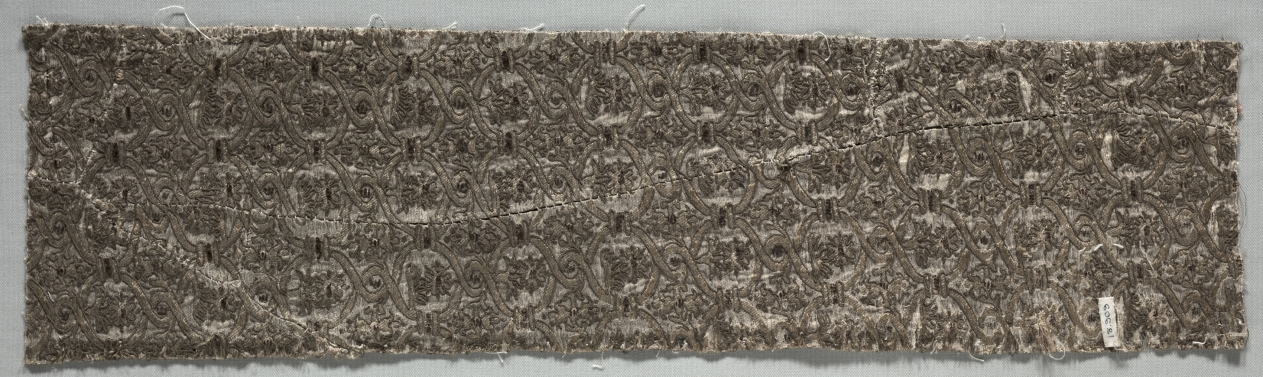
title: Brocaded Textile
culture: Italy, early 17th century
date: early 1600s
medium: plain compound cloth, brocaded and couched; silk and metal thread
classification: Textile